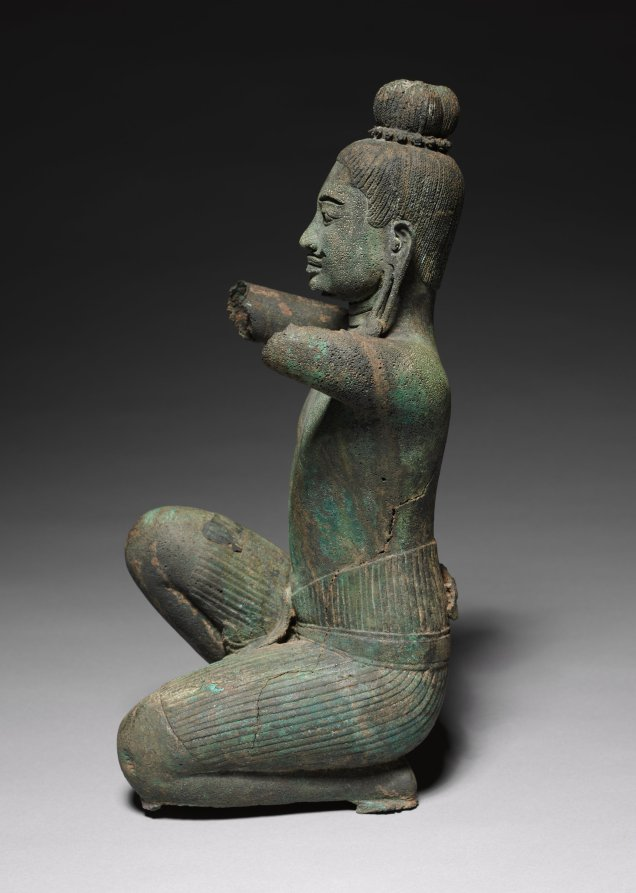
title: Kneeling Male Figure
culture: Cambodia, Angkor, Baphuon, Baphuon period, 1000s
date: 1010–80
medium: bronze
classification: Sculpture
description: The third eye in the forehead indicates that this figure identified himself with Shiva, but his kneeling stance with hands raised in a gesture of adoration indicates that he is a devotee of Shiva, who has taken on aspects of the god's physical appearance. The style of the lower garment with the low-slung belt is typical of work from the so-called Baphuon period of Khmer sculpture, like the stone standing image to the left. The eyes, eyebrows, moustache, and beard were once inlaid with silver.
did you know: This bronze figure was cast using the lost-wax (cire perdu) technique with the core armature inside.